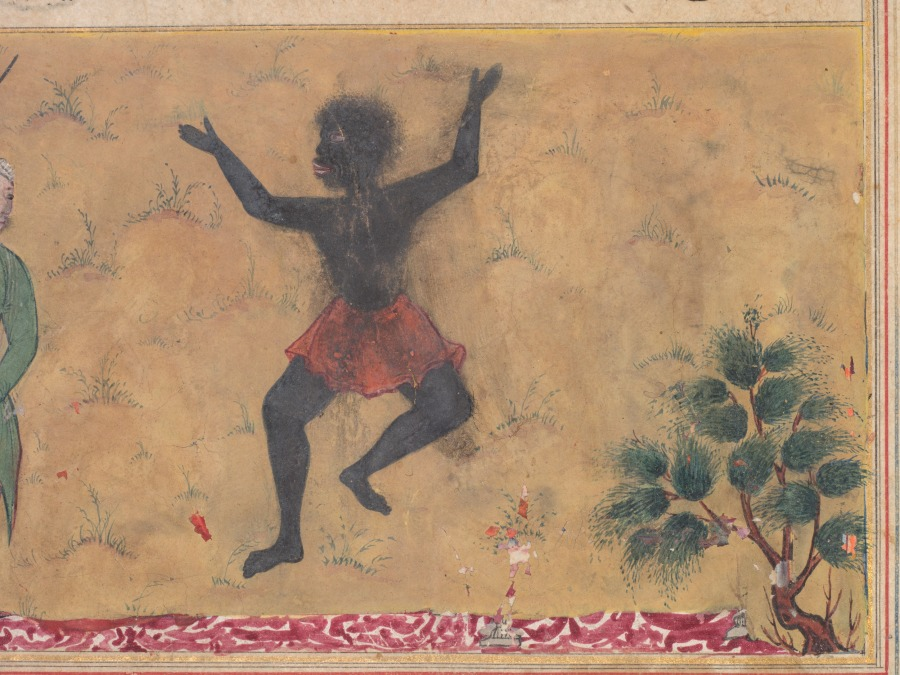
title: The court jester meets a Zangi dancing with joy, and learns from him that the cause of his happiness is his assignation with a woman who is the jester’s own wife, from a Tuti-nama (Tales of a Parrot): Twenty-second Night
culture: Mughal India, court of Akbar (reigned 1556–1605)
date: c. 1560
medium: gum tempera, ink, and gold on paper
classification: Painting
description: In the opening scene of the parrot’s bawdy story about a jester, who is shown wearing green on his way to perform at the court of the emir, he came upon an Ethiopian, known as Zangi, dancing by the side of the road. When he learned that the Zangi was overjoyed because he was planning to meet his beloved, the jester’s own wife, the jester was so distraught he was unable to perform, and the emir threw him in prison. The artist depicted the Zangi as described in the text as semi-wild with caricatured physical traits, uncovered head, and little clothing.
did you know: The tale references stereotypes about Africans that were current in India and Iran when the text was written.